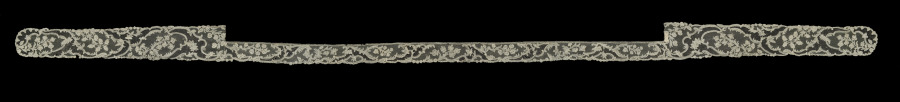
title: Bobbin Lace (Point d'Angleterre) Lappets and Edging for a Cap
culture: Belgium, Brussels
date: 1700s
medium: linen: bobbin lace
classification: Lace